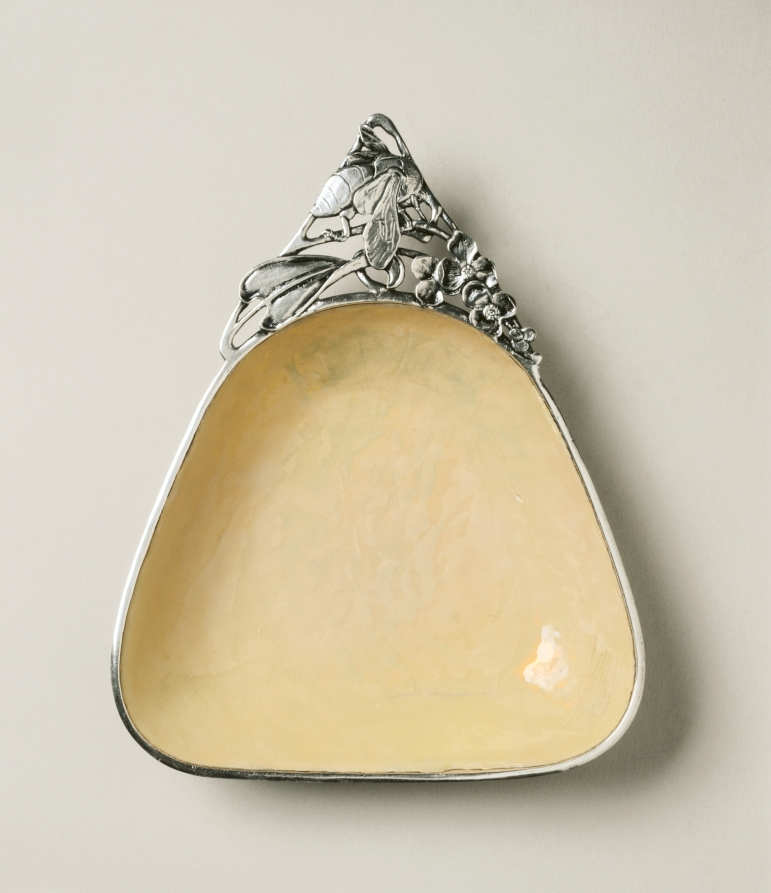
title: Dish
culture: America, Ohio, Cleveland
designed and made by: Horace Potter (1873–1948)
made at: Potter Studios (American)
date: c. 1910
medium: silver and enamel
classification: Silver